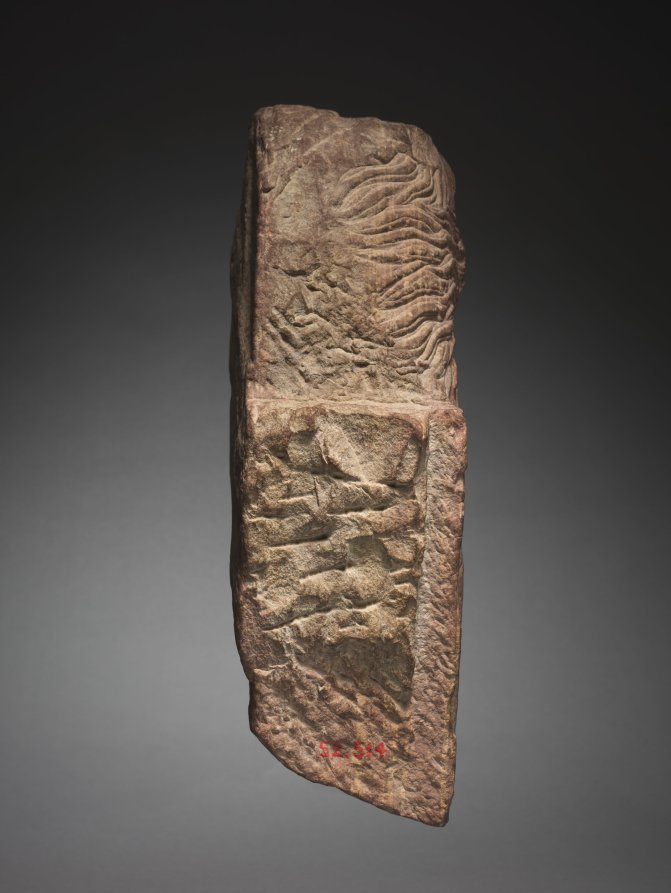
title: Lion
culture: Northern India, Uttar Pradesh, Mathura, Kushan period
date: 100s–200s CE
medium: sandstone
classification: Sculpture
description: Roaring lions such as this have been found on the throne of Kushan kings. Early sculptures of the Buddha also show him seated on a lion throne, and the roar of his teachings (dharma) extends throughout the world.